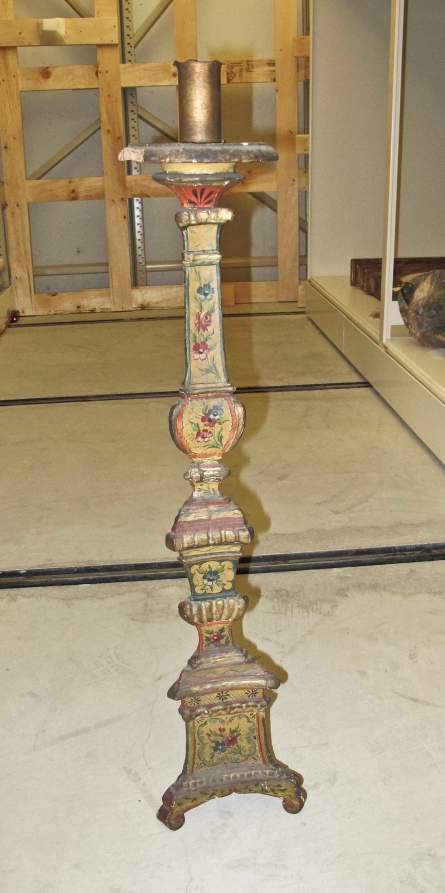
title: Candleholder (2 of 2)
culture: Italy, Florence, 18th century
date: 1700s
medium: carved and painted wood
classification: Furniture and woodwork